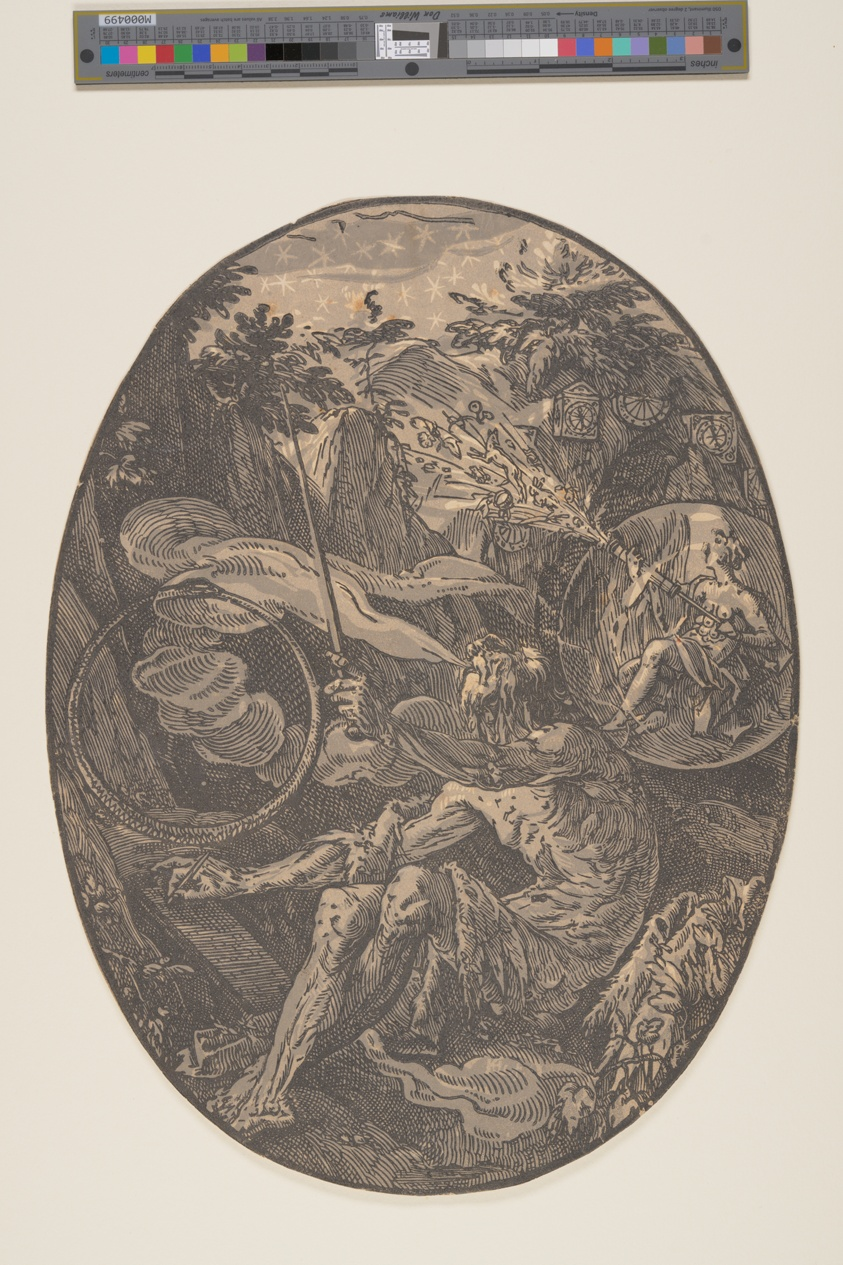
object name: Print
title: Demogorgon in the Cave of Eternity, from The Deities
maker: Hendrick Goltzius (Dutch, 1558–1617)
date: 1588/90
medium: Chiaroscuro woodcut from three blocks in tones of gray on ivory laid paper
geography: Netherlands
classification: print; paper; prints and drawing; woodcut